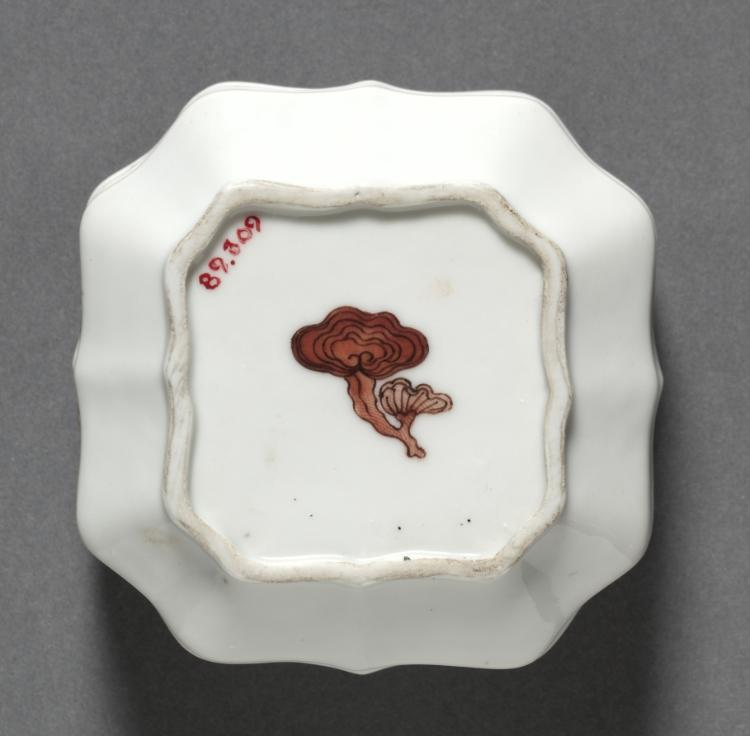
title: Square Covered Box with Hundred Antiquities (lid)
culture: China, Jiangxi province, Jingdezhen kilns, Qing dynasty (1644-1911), Yongzheng mark and reign (1723-35)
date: 1723–35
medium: porcelain with famille rose overglaze enamel decoration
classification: Ceramic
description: The painted decoration in this box cover provides an interesting image of the antiquities and objects being collected in the Chinese scholar’s desk—all of which are emblems of taste, status, and affluence. Connoisseurship, art cataloguing, art historical study, and elegant social gatherings developed alongside art collecting as part of the Chinese literati culture.